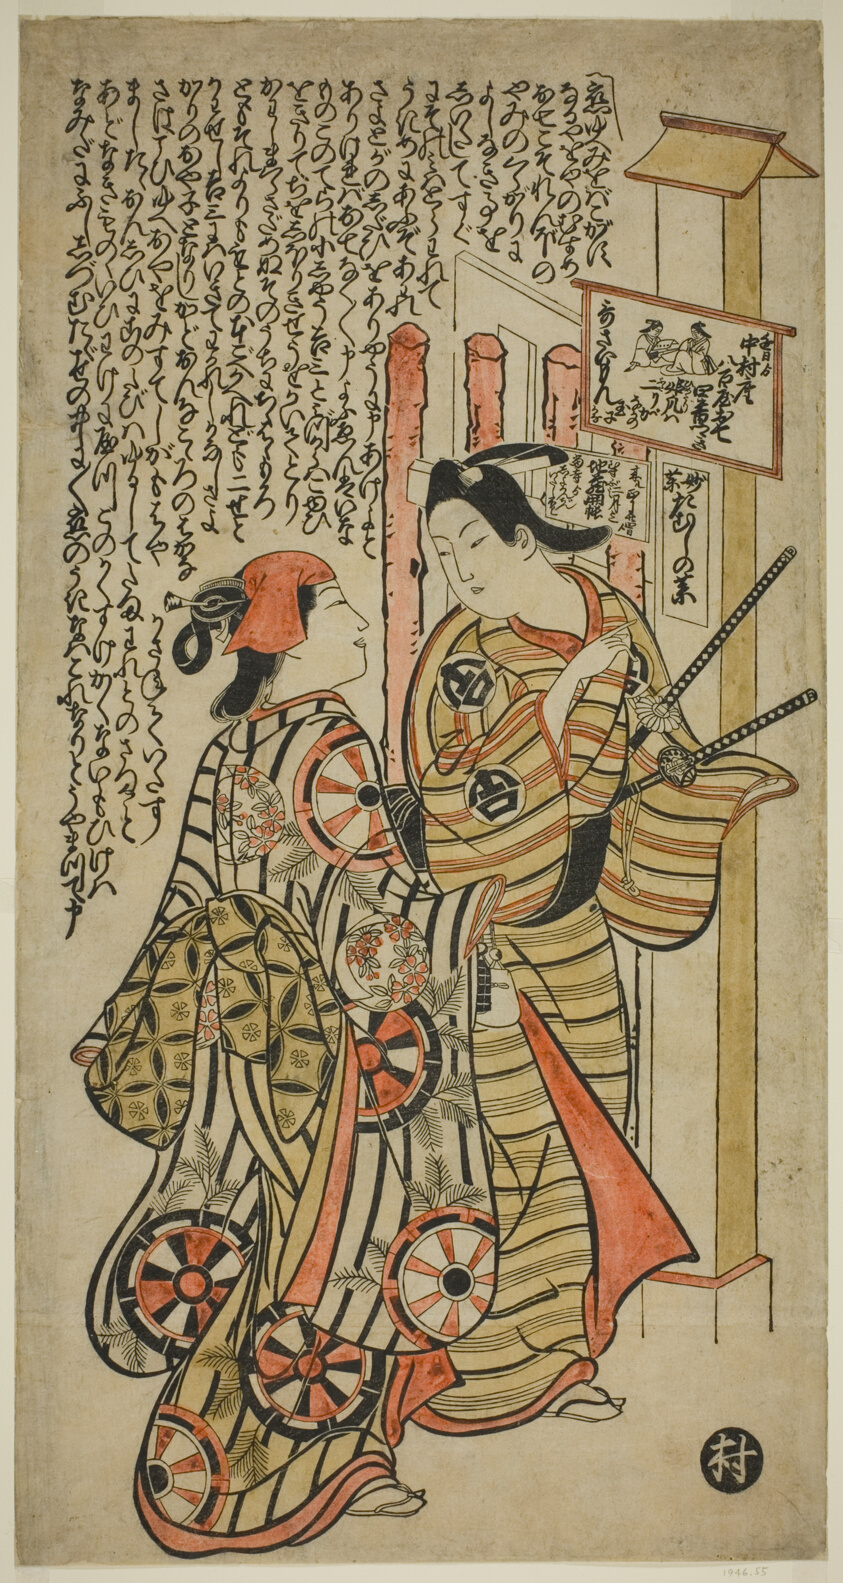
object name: Print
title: Two Lovers, Oshichi and Kichisaburo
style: Japanese (culture or style)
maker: Attributed to Okumura Masanobu; Japanese, 1686-1764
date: c. 1708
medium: Hand-colored woodblock print; o-oban, tan-e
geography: Japan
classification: woodblock print; print; asian art